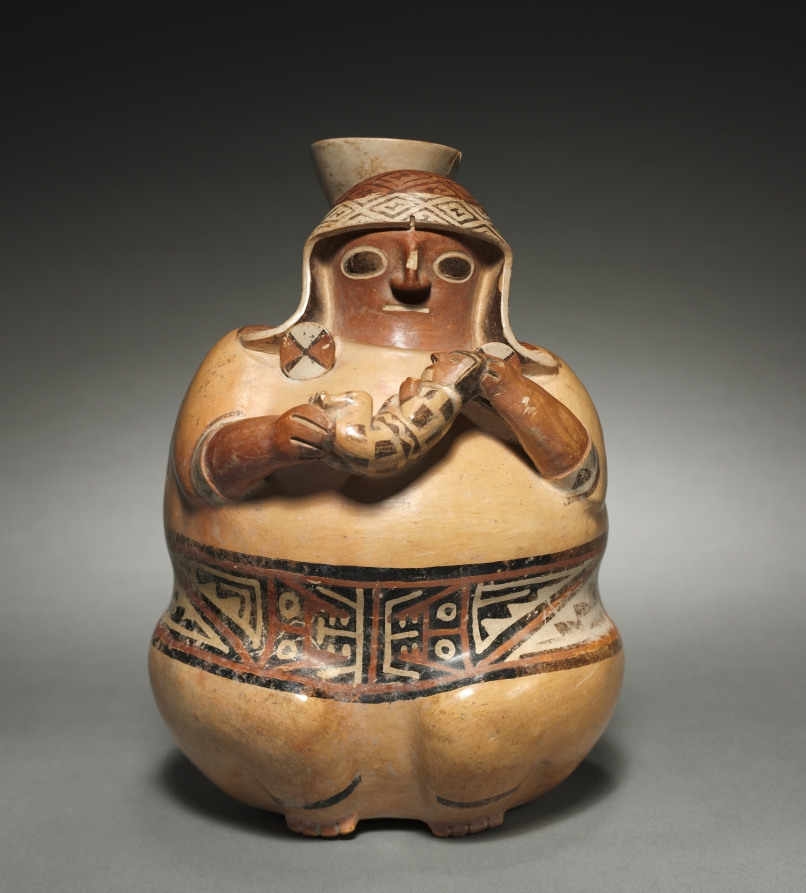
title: Mother-and-Child? Vessel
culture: Central Andes, North Highlands, Recuay people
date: 1–700 CE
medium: ceramic, slip, pigment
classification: Sculpture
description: Well-dressed, important women like this one are depicted fairly often in Recuay art. These women hold a variety of things, ranging from cups that may refer to feasts held on important political occasions to small figures commonly interpreted as children, as here. These and other representations have led scholars to suggest that Recuay women held authority independent of their male partners; their authority may have stemmed in part from involvement in feasting celebrations.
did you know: Recuay ceramics typically use only three colors: black, white, and red.